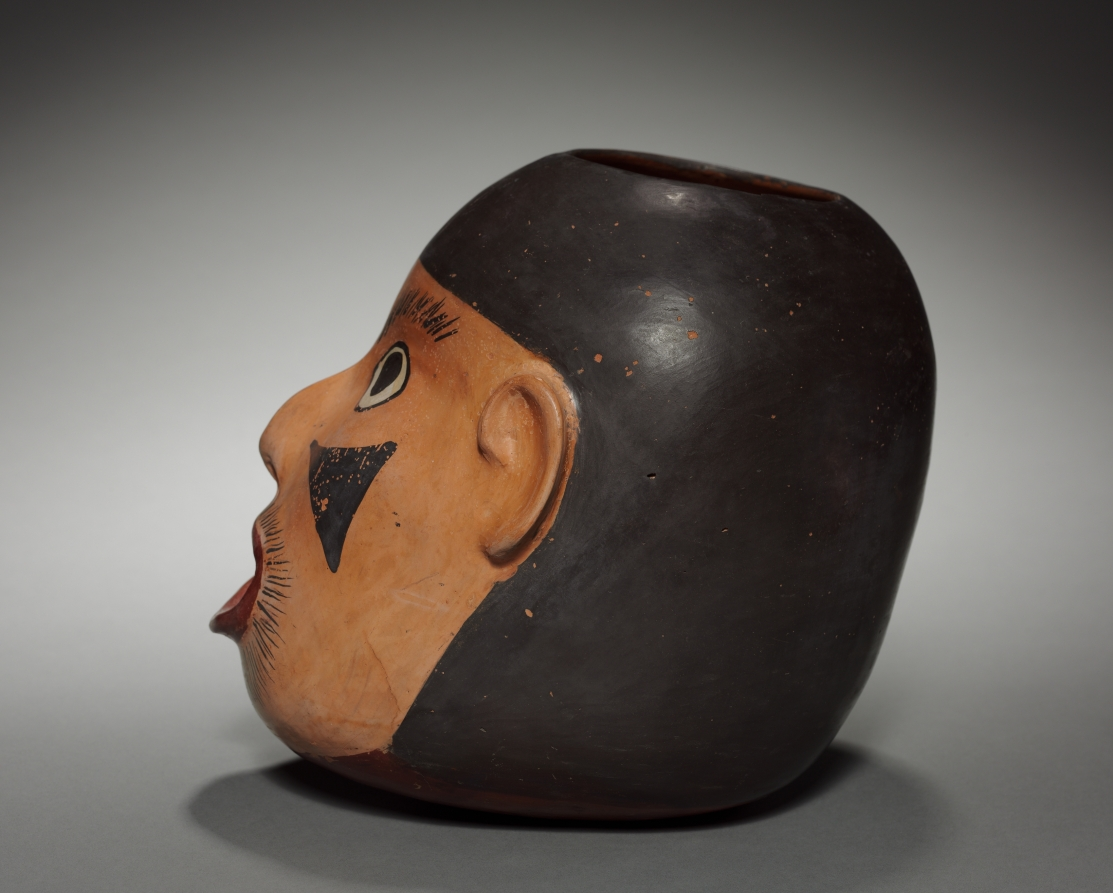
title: Severed Head Effigy Vessel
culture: Peru, South Coast, Nasca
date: c. 100–350 CE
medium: earthenware with colored slips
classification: Ceramic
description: The Nasca people were organized politically into small, competing chiefdoms, and warfare was common. This vessel represents a freshly severed human head (probably that of a captured and sacrificed prisoner) with staring eyes, gaping mouth, and blood-red underside. Modeling of the mouth cavity, tongue, and teeth lends the image a startling realism. Human sacrifice by decapitation was a central element of Nasca religion, essential to agricultural fertility. Severed heads were emptied and dried, then pierced through the forehead and suspended from a thick cord. Such preserved heads have been recovered from offering deposits and from tombs, where they were buried with their captors.